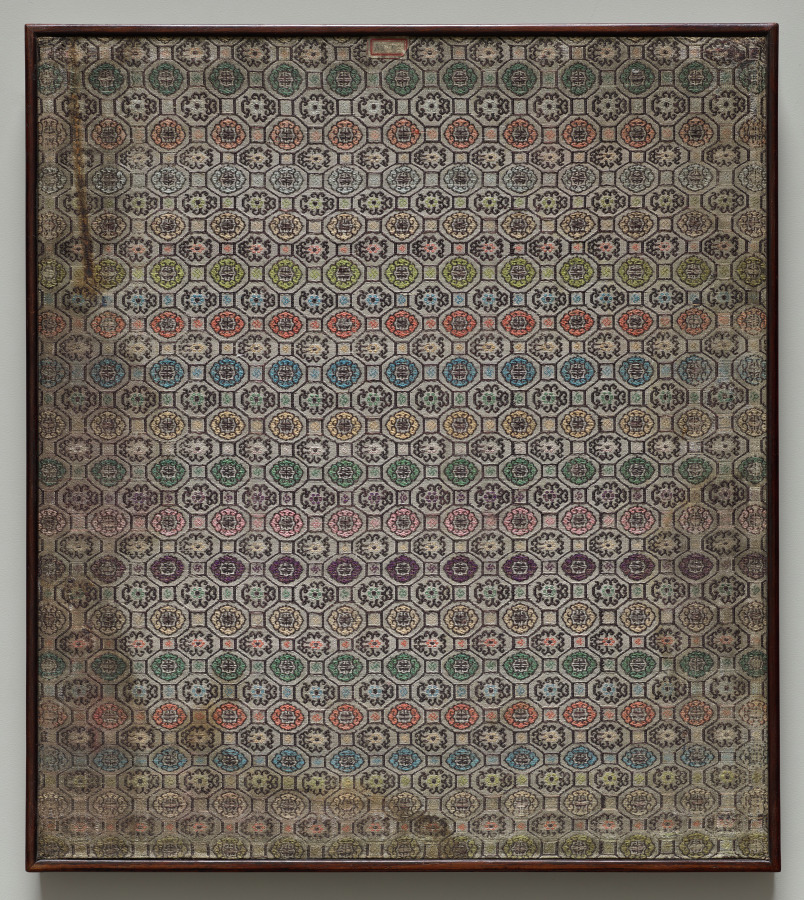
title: Absorb the Past; Abandon the Present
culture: China, Qing dynasty (1644–1911)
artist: style of Qian Hui'an (Chinese, 1833–1911)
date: 1800s–1900s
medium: Accordion-style album of 10 painted leaves; ink and color on silk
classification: Painting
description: Qian Huian, active in Shanghai, was best known for his paintings of beautiful women, and historic and mythological figures, rendered in a distinct style. His figures appear eccentric and the color palette pale to pink. The album’s title, Absorb the Past, Abandon the Present, reflect the desire to find refuge in China’s Past, as the country was going through the devastating Taiping rebellion at the time the paintings were created.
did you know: Leaf four depicts Tao Yuanming, carried by servants in a basket as he had an ailing foot. Tao wrote the Peach Blossom Spring tale, in which a fisherman loses his way and ends up in a utopia.